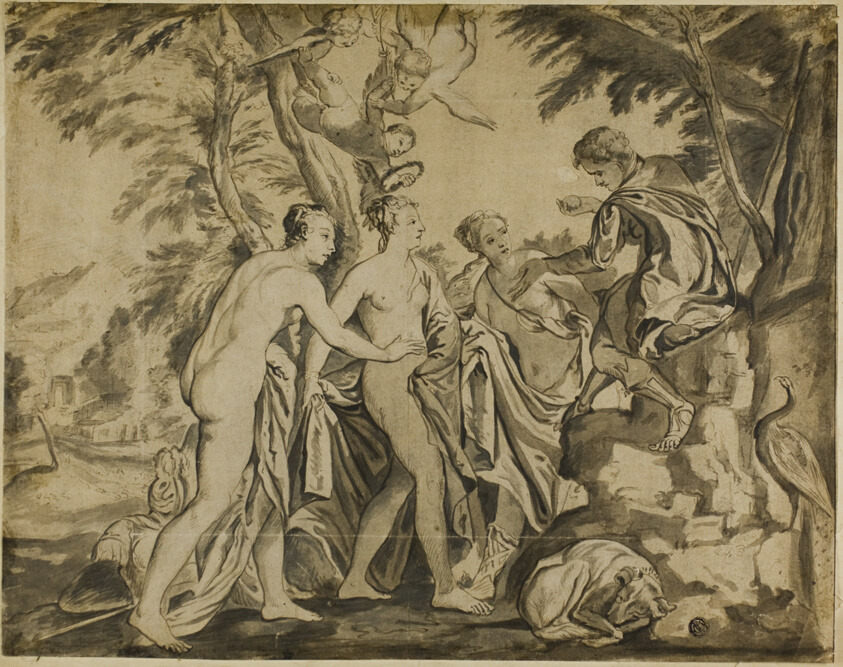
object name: Drawing and Watercolor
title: Judgement of Paris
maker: After Workshop of Paolo Caliari, called Veronese; Italian, 1528-1588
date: 17th century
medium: Pen and brown ink and brush and brown wash, on tan laid paper, edge mounted to tan board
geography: Italy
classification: ink and wash; drawings (visual works); prints and drawing